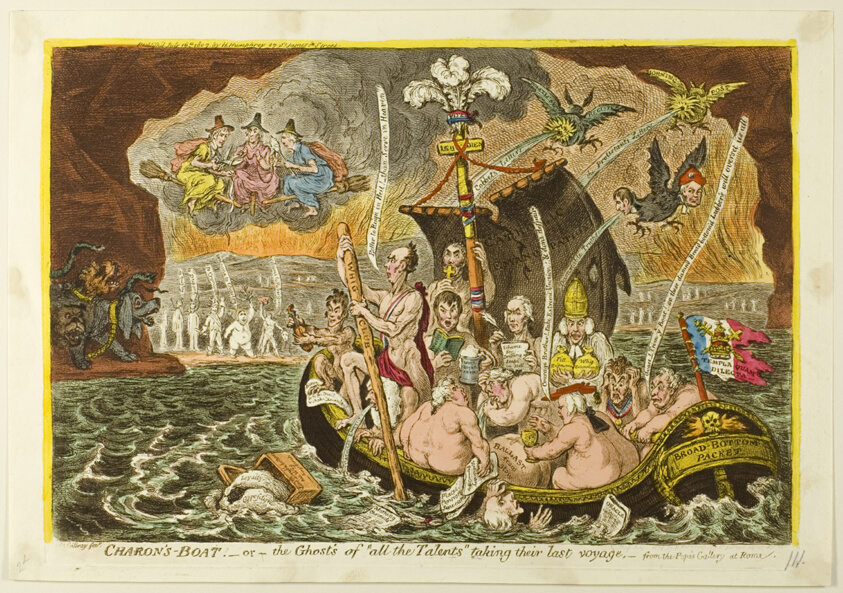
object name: Print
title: Charon's Boat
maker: James Gillray (English, 1756-1815); published by Hannah Humphrey (English, c. 1745-1818)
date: published July 16, 1807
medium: Hand-colored etching on paper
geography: England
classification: etching; print; prints and drawing